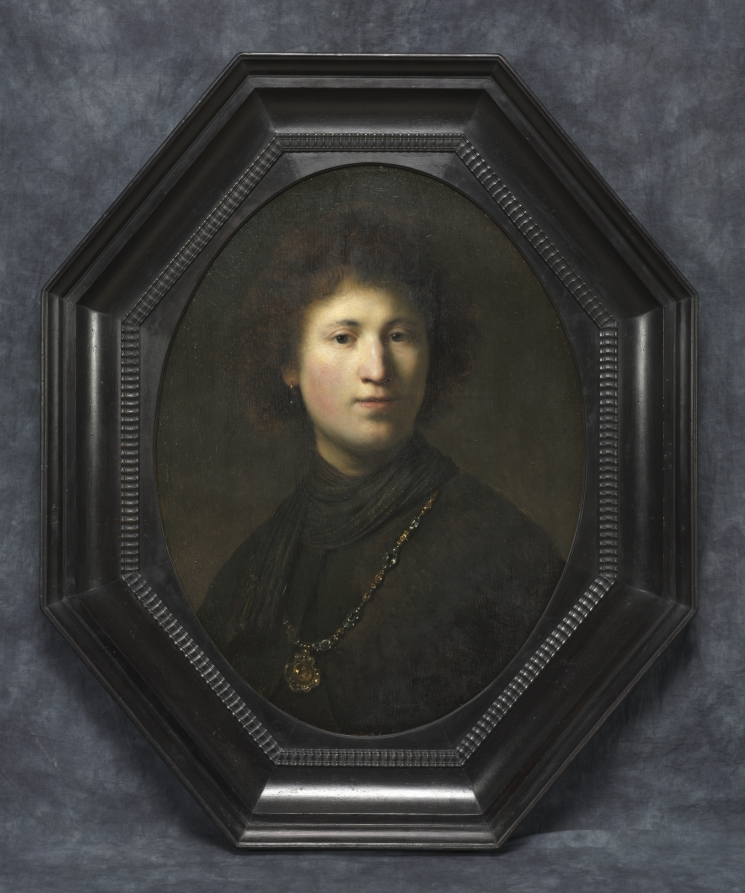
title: A Young Man with a Chain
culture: Netherlands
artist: Rembrandt van Rijn (Dutch, 1606–1669)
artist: and Studio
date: c. 1629 or 1632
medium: oil on wood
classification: Painting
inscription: Signed at right: "RHL van Rijn / 1632 [RHL in monogram]"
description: This painting is an example of a tronie, a Dutch word meaning “head” or “facial expression.” Tronies were not intended to be identifiable portraits, but artistic investigations of facial appearance and fanciful costume. Particularly in the years around 1630, Rembrandt used this popular format to explore different lighting effects and facial expressions. Here, the strong contrast of light and shade shapes the contours of the young man’s face; unusual accessories such as the striped scarf and glittering pendant on a jeweled chain add an exotic touch. Although this painting bears Rembrandt’s monogram, the authorship is not certain. Some scholars have attributed it to Isaac de Joudreville (1613–1648), a pupil and associate of Rembrandt who painted comparable tronies in a similarly smooth and elegant style.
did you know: Once identified as Rembrandt himself, the sitter is now considered an anonymous study of human character.